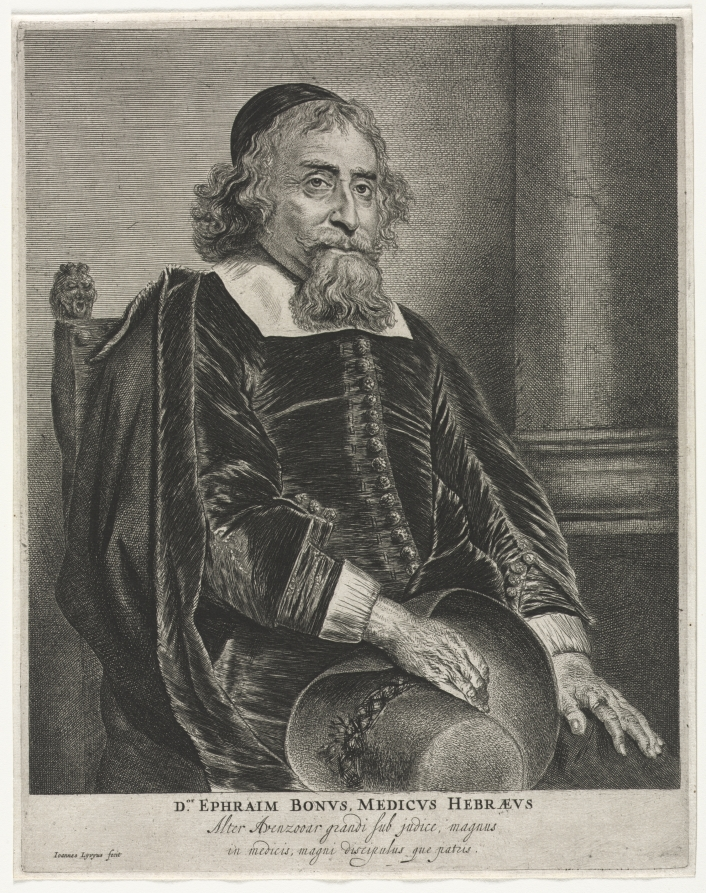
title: Ephraim Bonus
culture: Netherlands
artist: Jan Lievens (Dutch, 1607–1674)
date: 1640–65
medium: etching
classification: Print